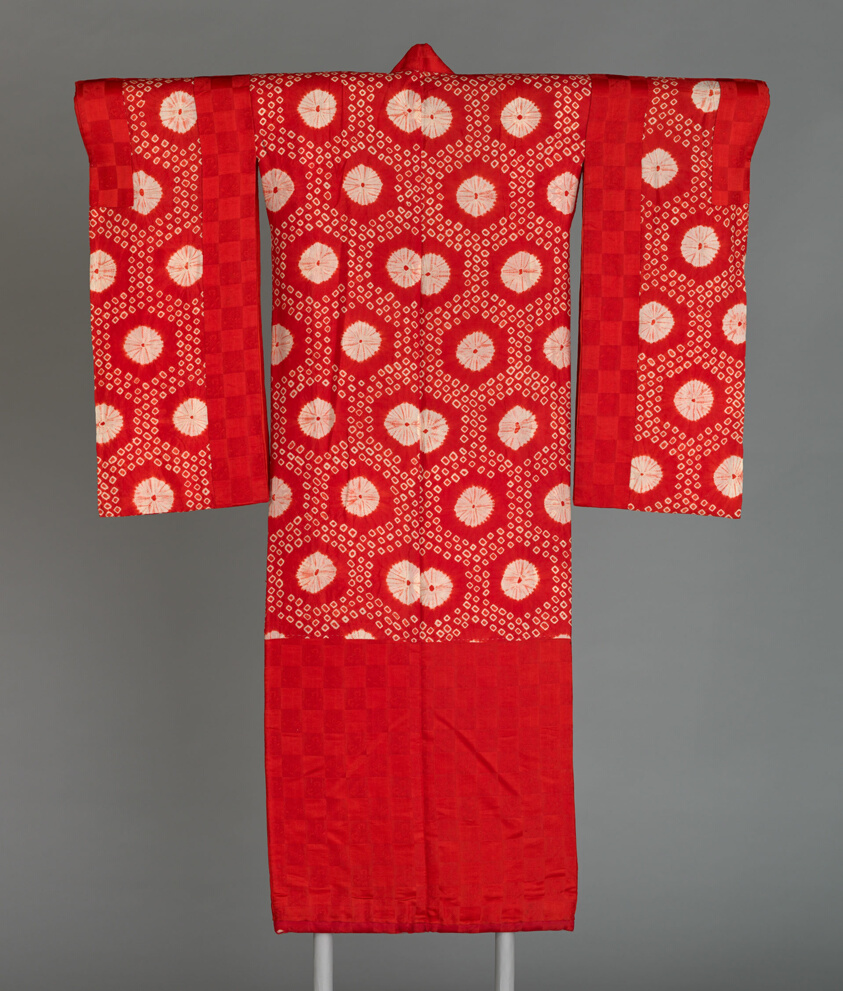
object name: Textile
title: Dônuki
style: meiji, Japanism, East Asian, asian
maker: Japan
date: 1883/1900, Meiji period (1868–1912)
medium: upper portion: silk, plain weave; tie-dyed (shibori); lower portion: silk, satin weave, self-patterned by areas of plain weave; lined with silk, plain weave; silk, padding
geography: Japan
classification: textile; weaving - printed; weaving; costume - printed; costume; dress (garment); clothing